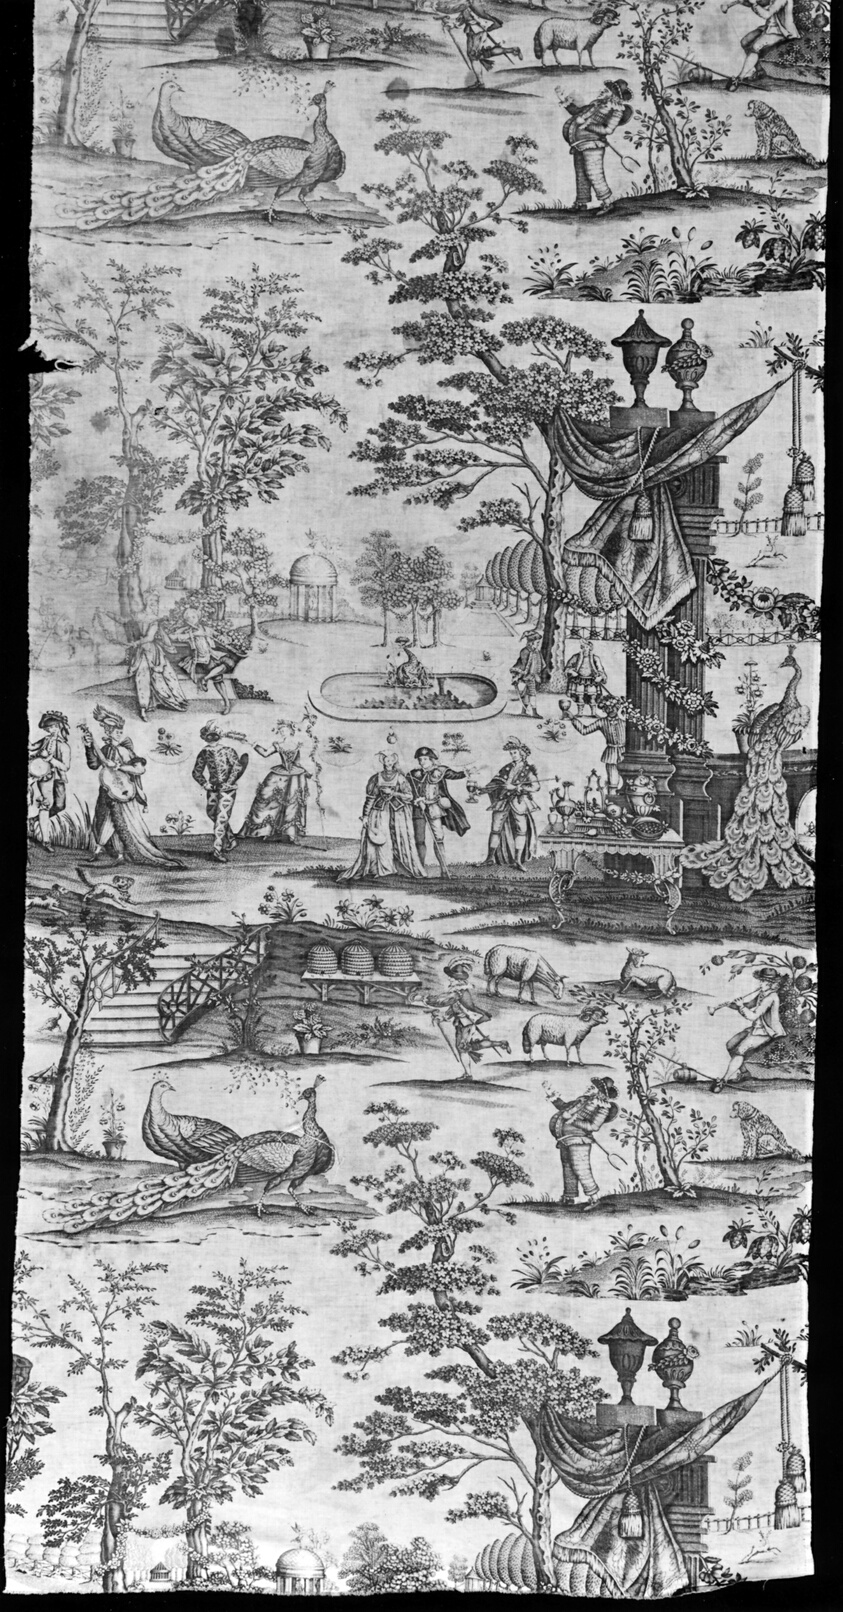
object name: Textile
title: Commedia del'Arte (Furnishing Fabric)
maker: France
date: 18th century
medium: Cotton, plain weave; copperplate printed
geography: France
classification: textile; weaving - printed; weaving; furnishing textile